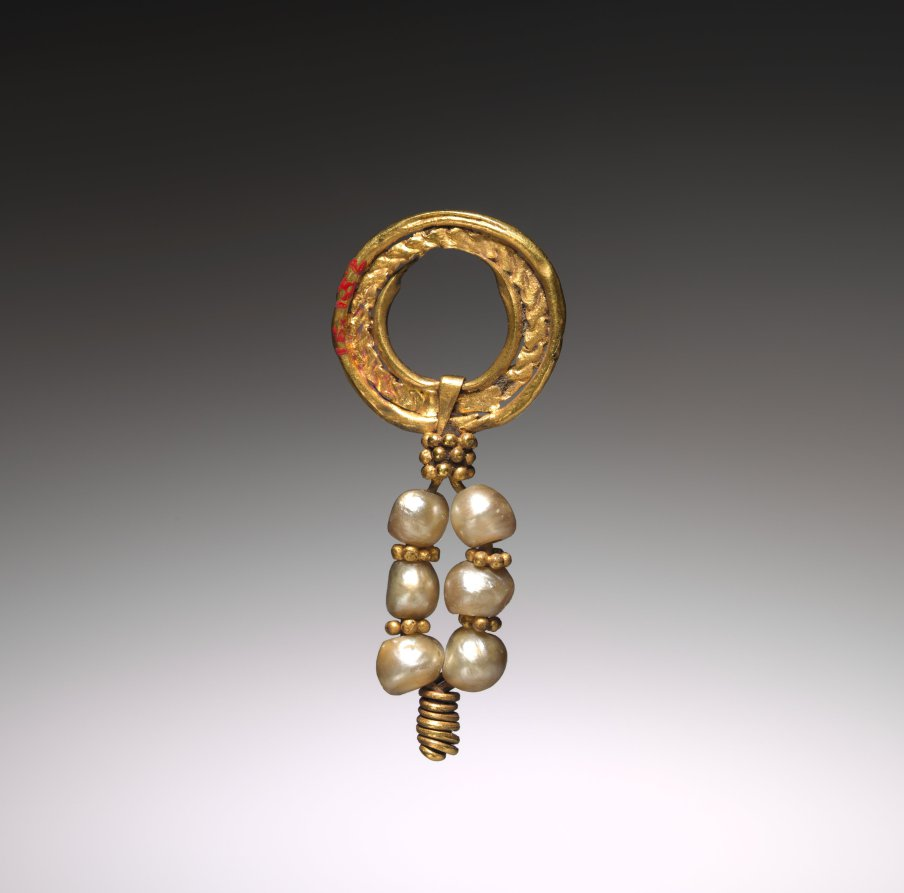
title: Pendant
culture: Byzantium (style of), probably 19th-20th century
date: probably 1800s-1900s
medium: gold with pearls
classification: Jewelry